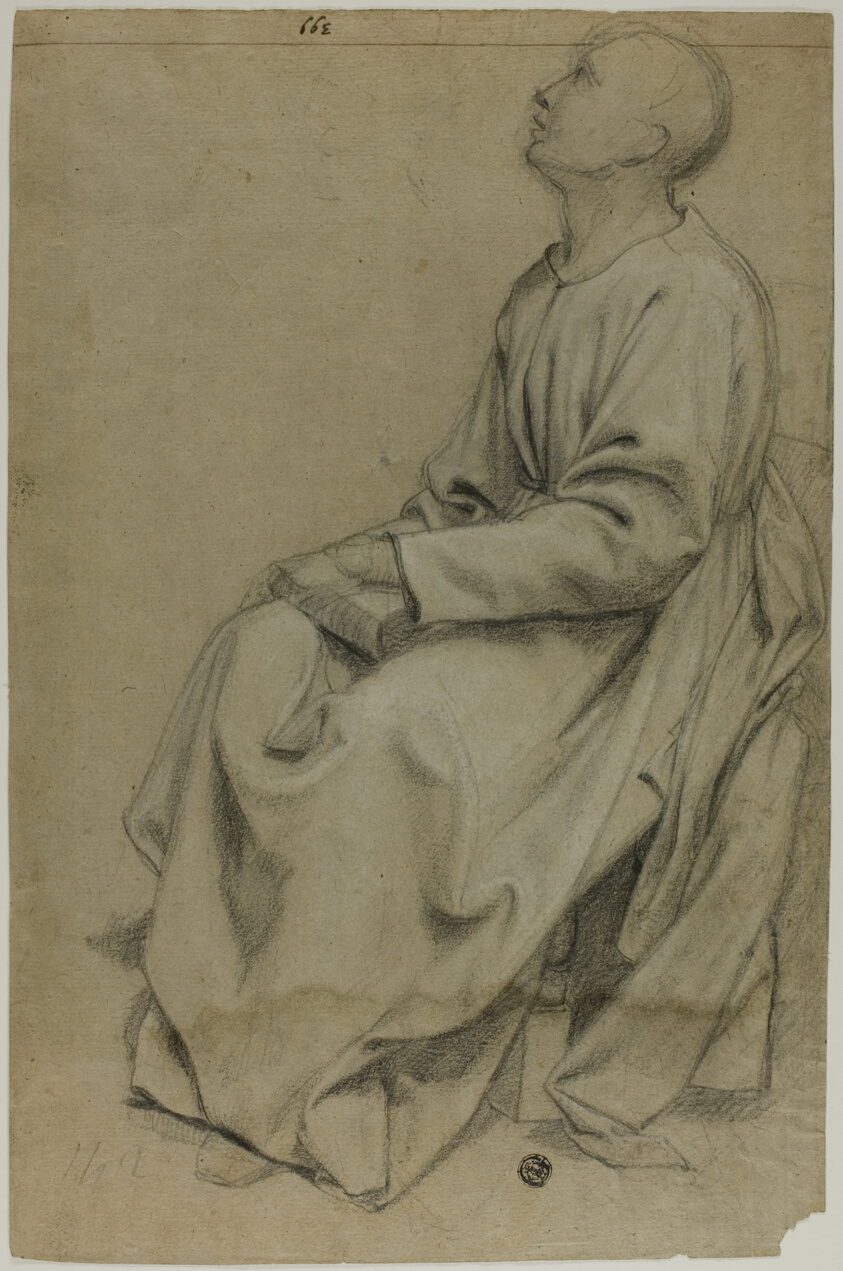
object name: Drawing and Watercolor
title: Seated Monk Holding Book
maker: Probably Domenico Fiasella (Italian, 1589-1669); or possibly Lodovico Carracci (Italian, 1555-1619)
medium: Black and white chalk on tan laid paper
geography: Italy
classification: chalk; drawings (visual works); prints and drawing